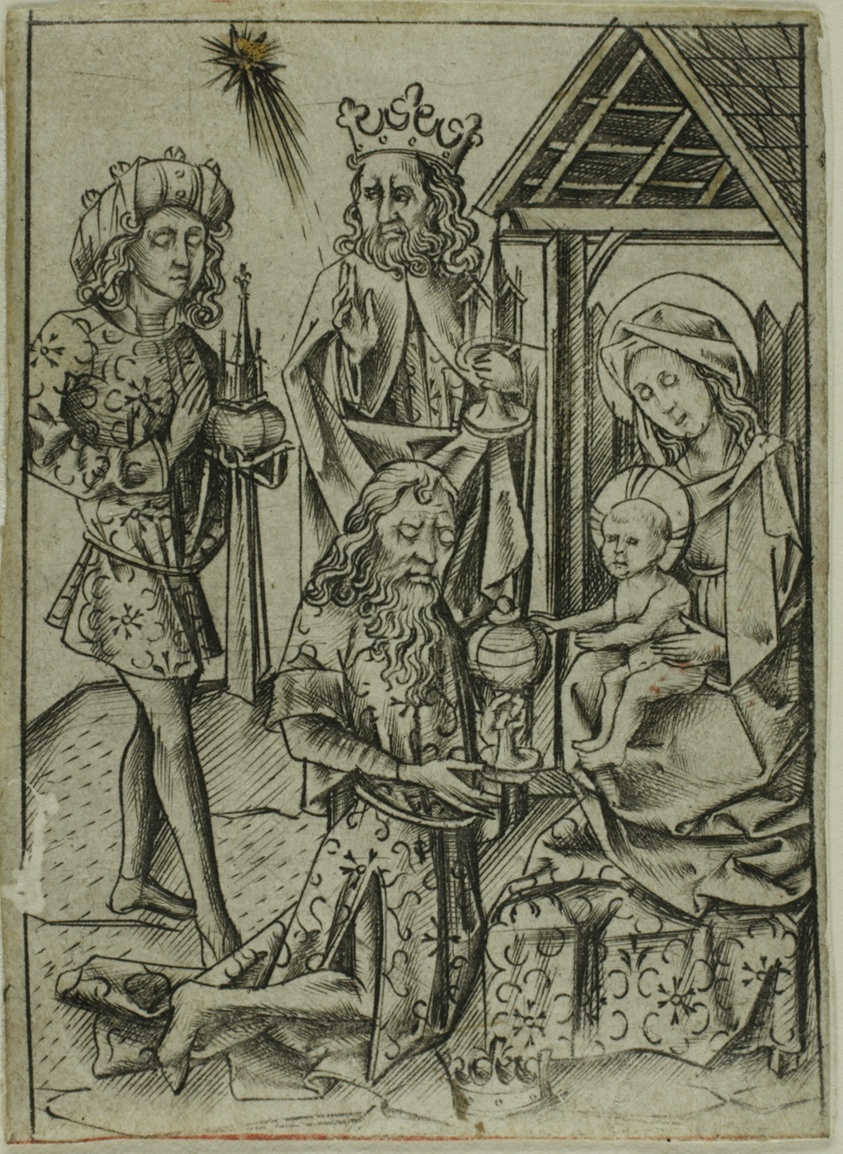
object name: Print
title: The Adoration of the Magi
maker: Israhel van Meckenem the Younger; German, c. 1440/45-1503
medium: Engraving in black on ivory laid paper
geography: Germany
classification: engraving; print; prints and drawing